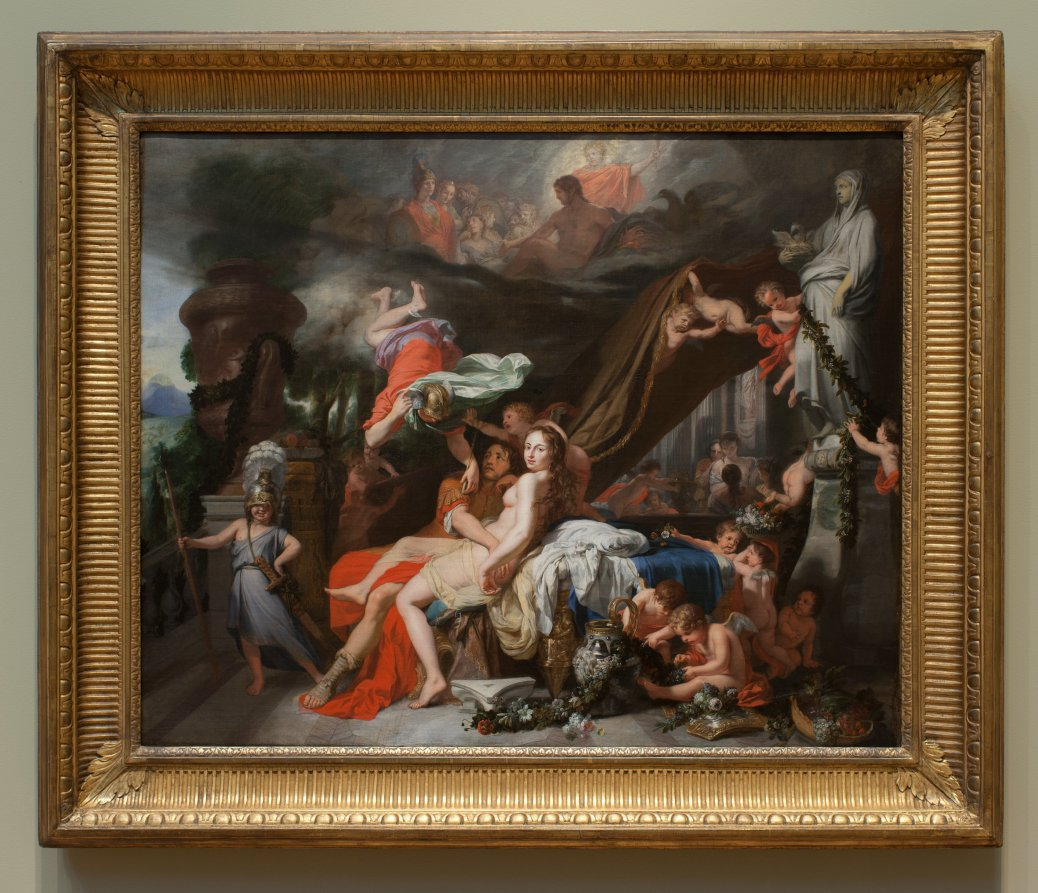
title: Hermes Ordering Calypso to Release Odysseus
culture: Netherlands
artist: Gerard de Lairesse (Flemish, 1641–1711)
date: c. 1670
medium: oil on canvas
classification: Painting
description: The Greek goddess Calypso held the hero Odysseus captive for seven years, preventing his return home from the Trojan War. Despite Calypso’s charms and the luxurious surroundings, Odysseus longed for his home and family, so the Olympian gods finally allowed his freedom. Here, the god Hermes swoops down to free Odysseus from Calypso’s embrace. De Lairesse, popularly known as the “Dutch Poussin,” introduced to the Netherlands a classicizing style influenced by artists of the French Academy.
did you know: Calypso, reclining on her bed, looks at us with the same charming smile she used on Odysseus.